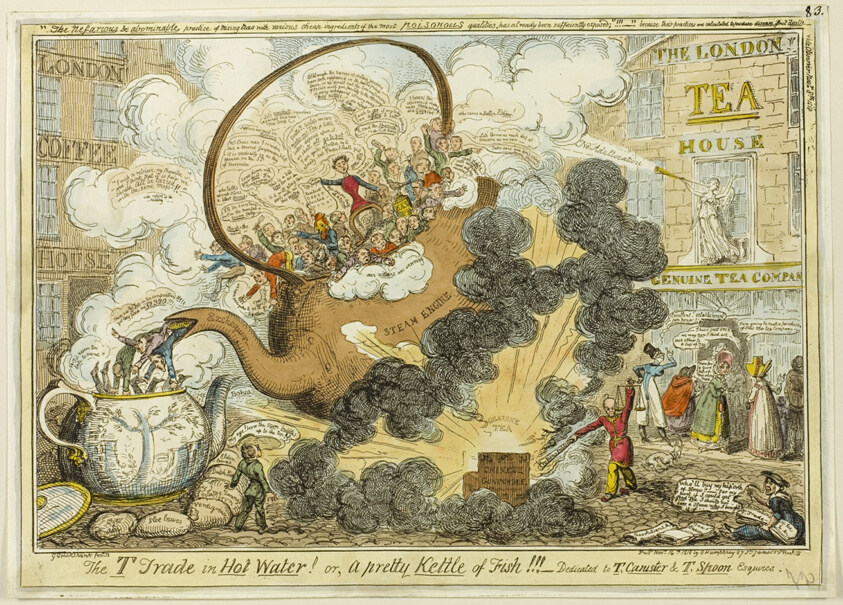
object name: Print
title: The T Trade in Hot Water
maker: George Cruikshank (English, 1792-1878); published by George Humphrey (English, c. 1773-1831)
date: published November 14, 1818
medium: Hand-colored etching on paper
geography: England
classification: etching; print; prints and drawing